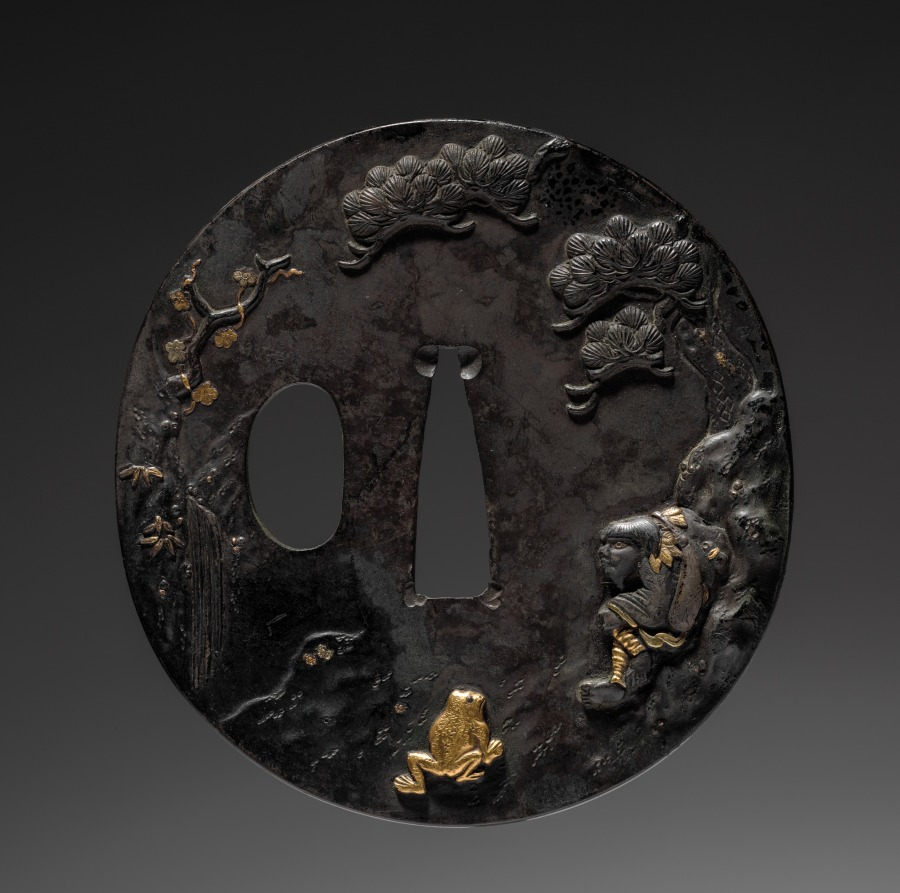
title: Sword Guard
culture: Japan, Edo period (1615–1868)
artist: Yoshimitsu (Japanese)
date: mid-1800s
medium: iron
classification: Arms and Armor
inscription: Signature: Yoshimitsu